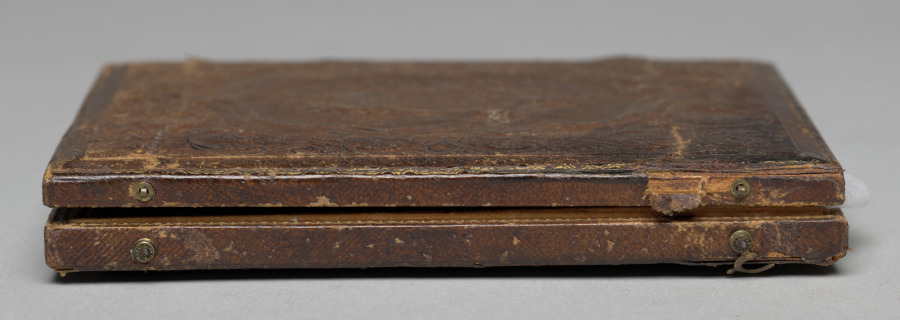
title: Homestead with picket fence and flowers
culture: America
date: c. 1857–65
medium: ambrotype, half plate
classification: Photograph